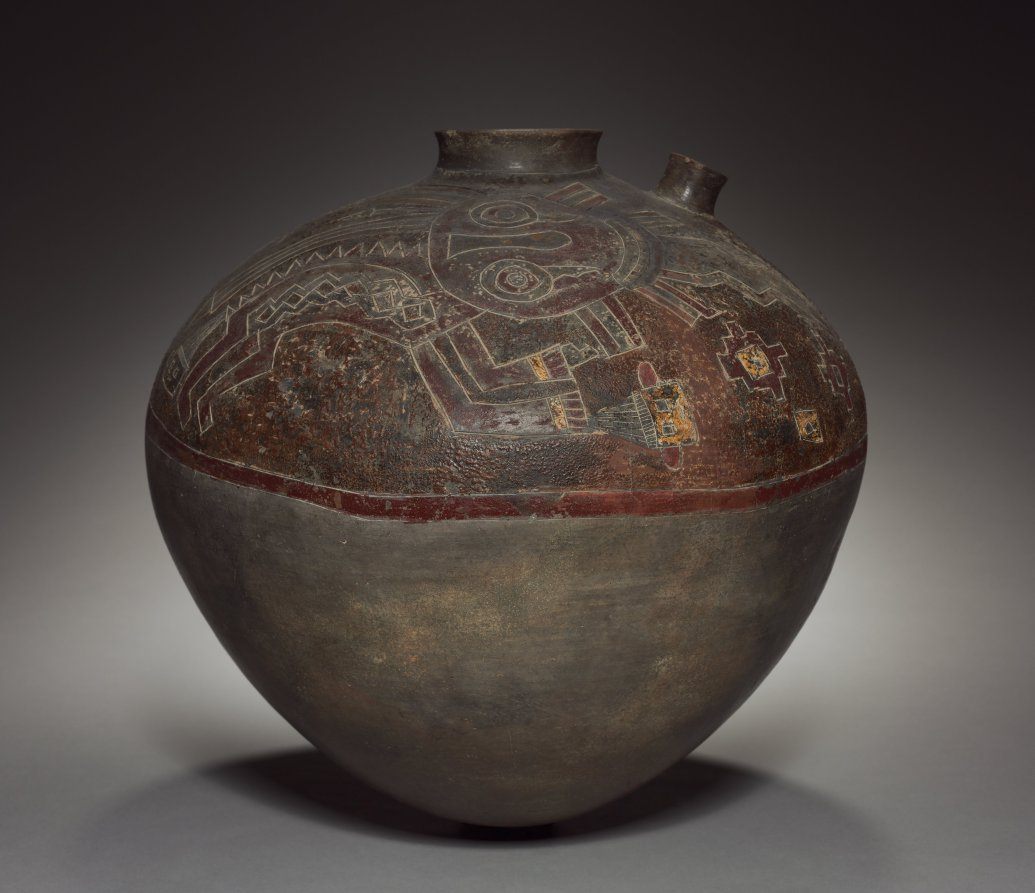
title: Vessel with Oculate Being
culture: Peru, South Coast, Paracas (Cavernas) style (700 BCE–1 CE)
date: 300 BCE–1 CE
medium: earthenware with resin-based paint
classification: Ceramic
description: A supernatural creature known today as the Oculate Being, after its huge eyes, became prominent late in Paracas times. The Paracas left no written records and this creature's meaning is poorly apprehended, but it clutches a severed human head by the hair. A hint of the head's significance comes from the Oculate Being itself, whose head sprouts streamers that may represent abstract energy or force. The severed head cult, then, may have aimed at capturing and redirecting this energy. (Other Paracas objects appear nearby.)